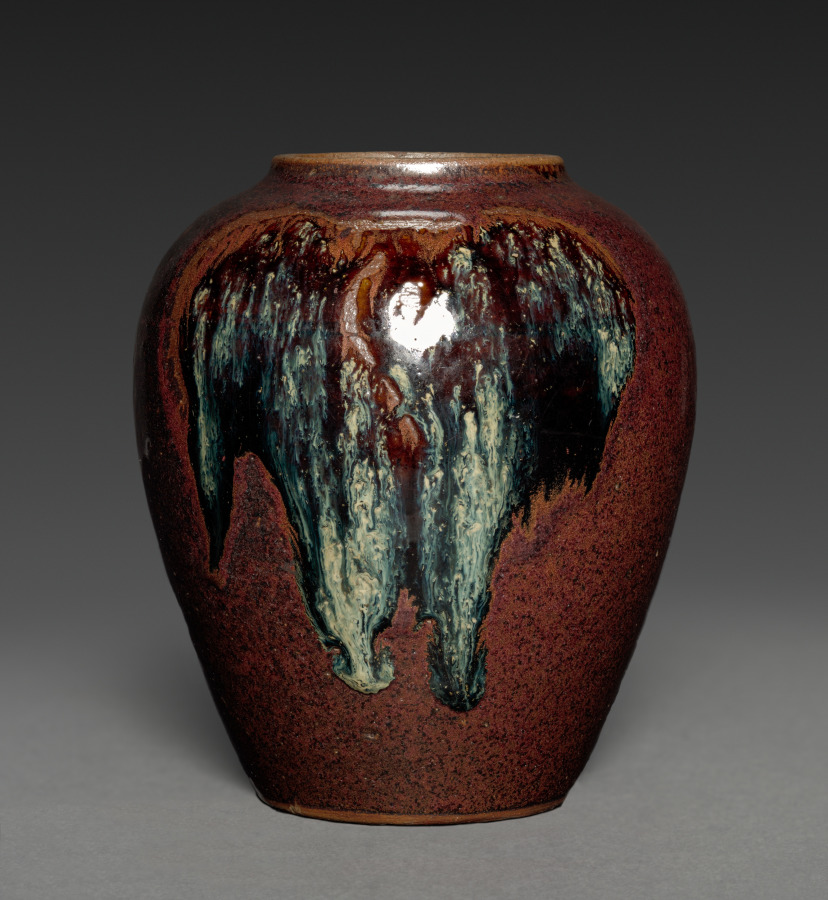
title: Inverted Pear-Shaped Jar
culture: Japan, Edo period (1615–1868)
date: 1800s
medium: pottery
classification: Ceramic